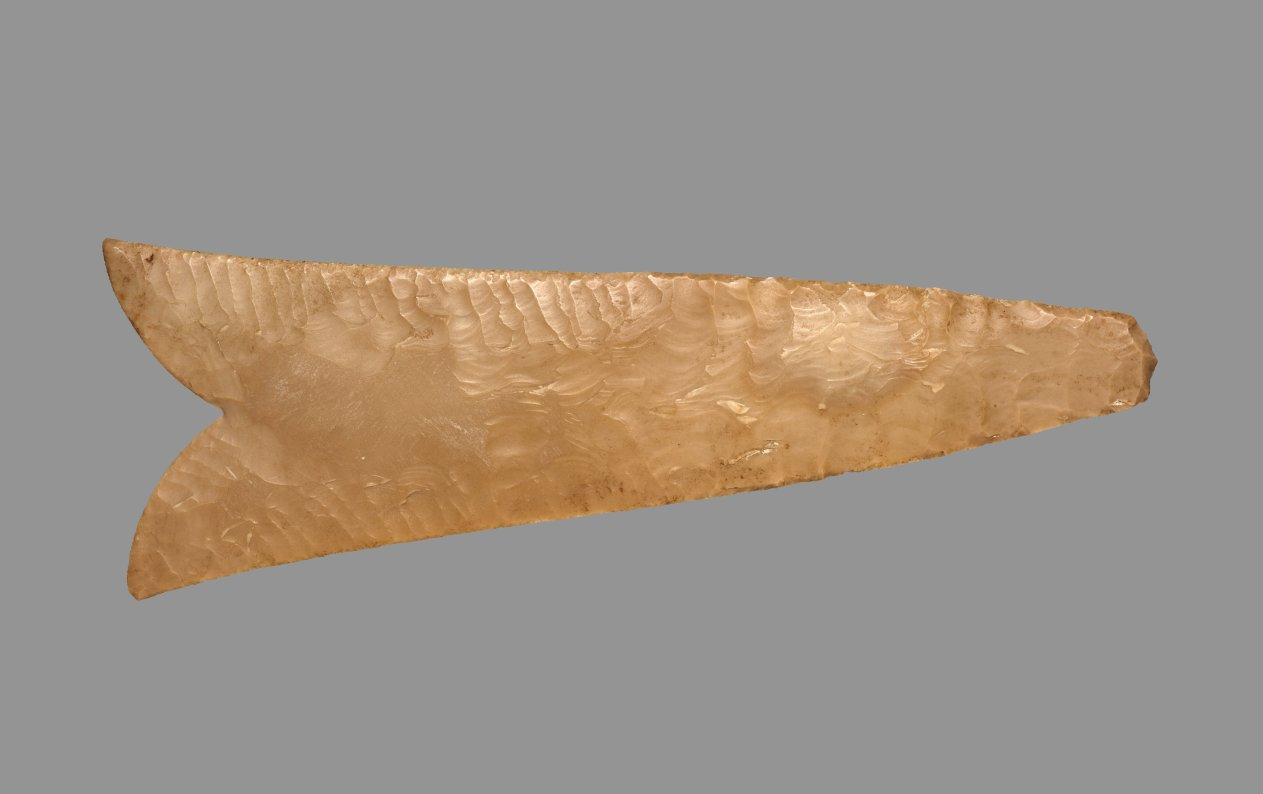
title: Fishtail Knife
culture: Egypt, Predynastic (5000–2950 BCE), Naqada II (3650–3300 BCE)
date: 4000–3000 BCE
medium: tan-colored flint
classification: Implements